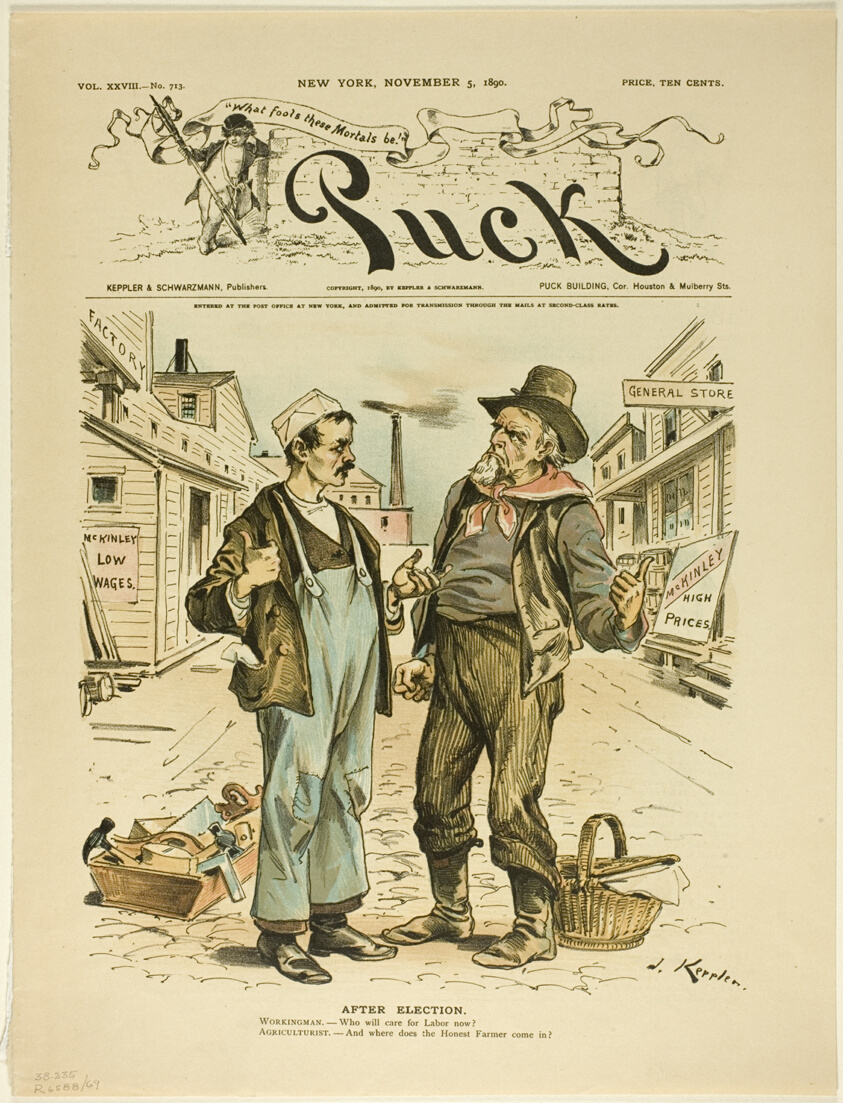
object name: Print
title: After Election, from Puck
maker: Joseph Keppler (American, 1638-1894)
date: published November 5, 1890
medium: Color lithograph on newsprint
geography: United States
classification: lithograph; print; prints and drawing